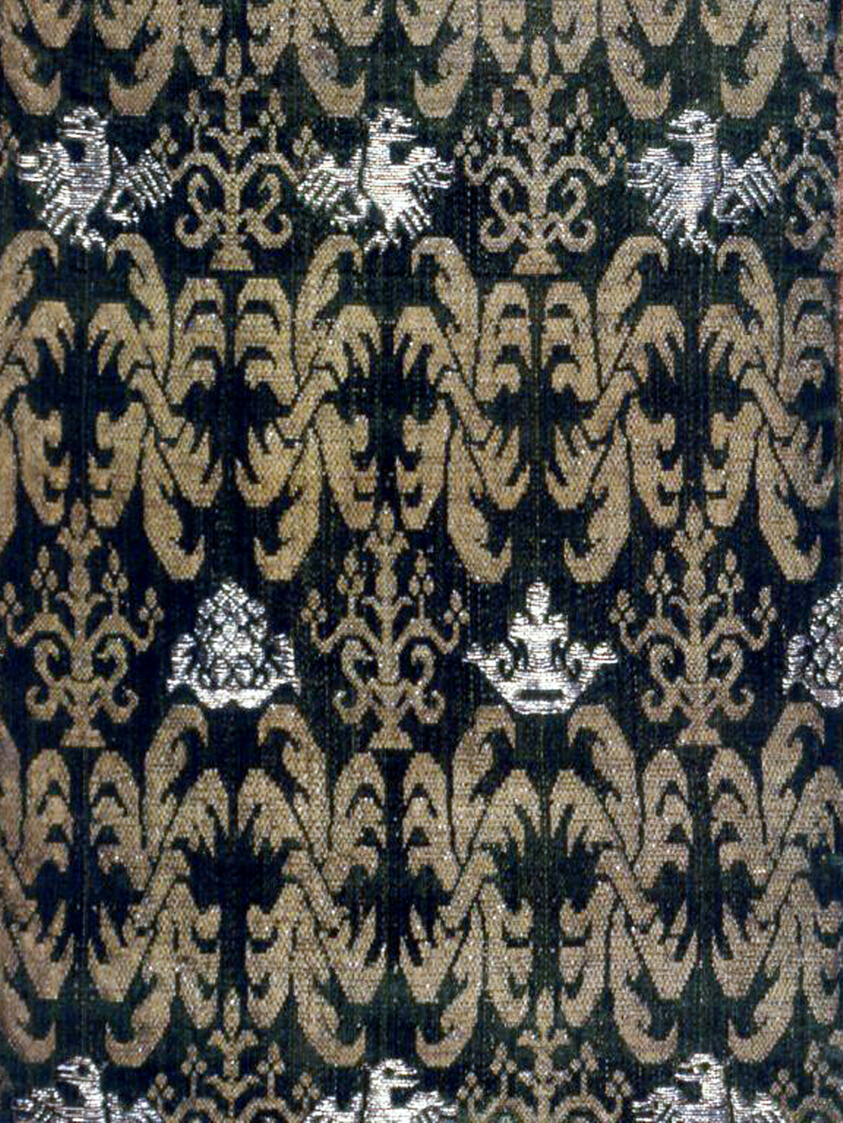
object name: Textile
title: Panel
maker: Spain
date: Late 16th century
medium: brocaded damask, satin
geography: Spain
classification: textile; weaving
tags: flowers, animals, birds, pineapples, crowns